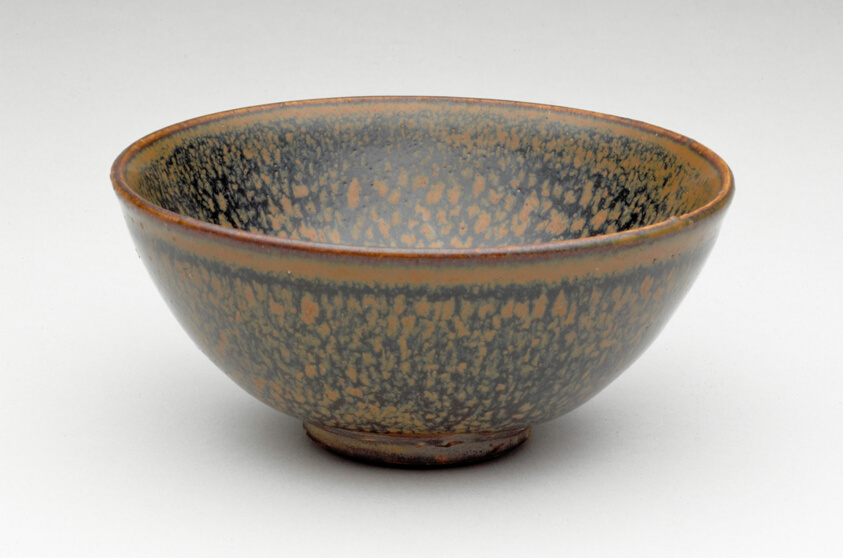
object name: Vessel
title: Teabowl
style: Chinese (culture or style)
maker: China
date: Jin dynasty (1115–1234), 12th century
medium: Northern blackware, Cizhou type; stoneware with black glaze and overglaze russet flecks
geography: China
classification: drinking vessel; stoneware; vessel